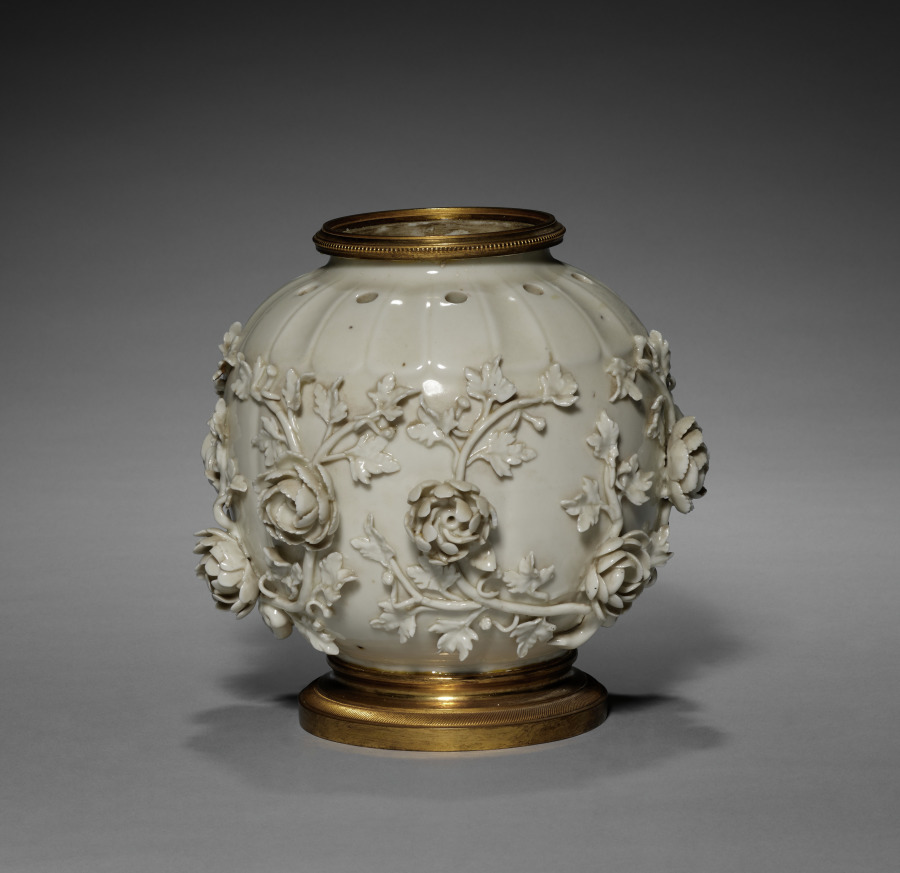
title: Potpourri Vase with Cover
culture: France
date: c. 1860–80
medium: blanc-de-chine porcelain; gilt bronze mount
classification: Ceramic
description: This vase was likely made by the celebrated Parisian ceramics firm of Edmé Samson (1810-91). To cater to the resurgence in taste for 18th-century designs, the Samson firm specialized in making reproductions of rare 18th-century European porcelains, especially those from firms that had already copied Chinese porcelains. In this case, this vase's design is taken from models produced by the St. Cloud factory in the 1750s after earlier Qing dynasty Chinese ceramics. However, the telltale sign that this vase is made by Samson and not St. Cloud is that the original would have been made from a soft-paste porcelain (fired at a lower temperature), while this example is made of hard-paste porcelain (fired at the highest temperature).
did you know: Potpourri vases always have holes in the top to let the scent of dried spices and flowers contained within freshen the air around them.